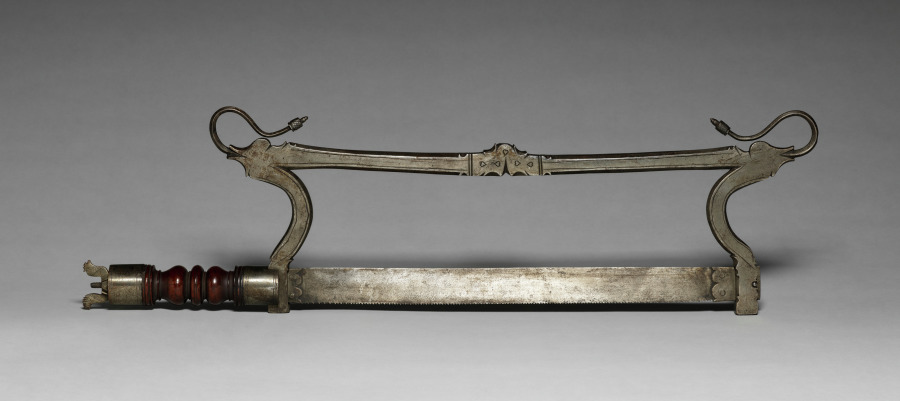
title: Hand Saw with Blade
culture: Europe, 17th century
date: 1600s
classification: Tool